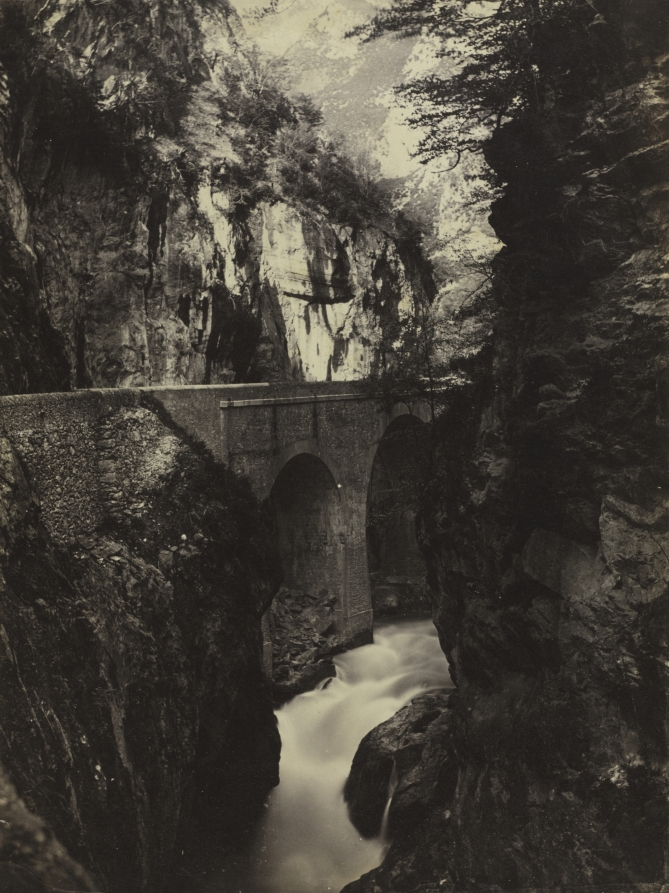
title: Road to Eaux-Chaudes, Pyrenees (recto)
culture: England, 19th century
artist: Farnham Maxwell Lyte (British, 1828–1906)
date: c. 1855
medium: albumen print from wet collodion negative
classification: Photograph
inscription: Written in ink on recto: "Road to Eaux-Chaudes, Pyrenees"; in pencil on recto: "Lyte"